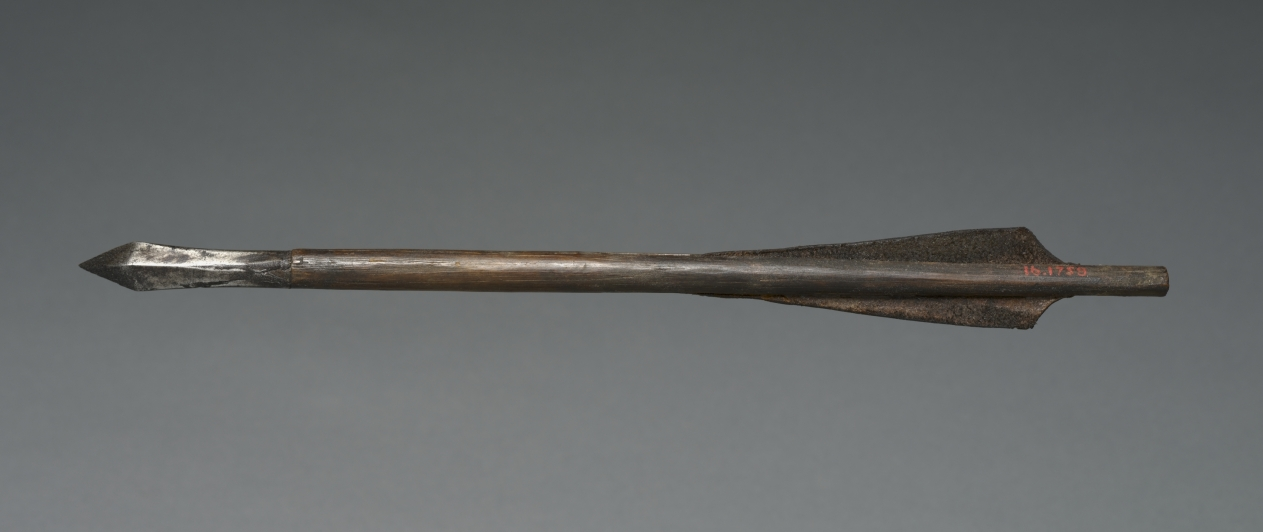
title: Crossbow Bolt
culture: Germany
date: 1500s–1600s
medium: wood, leather, steel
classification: Arms and Armor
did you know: Bolts with leather feathering were used mainly in the Tyrolean area, which includes northern Italy and western Austria.